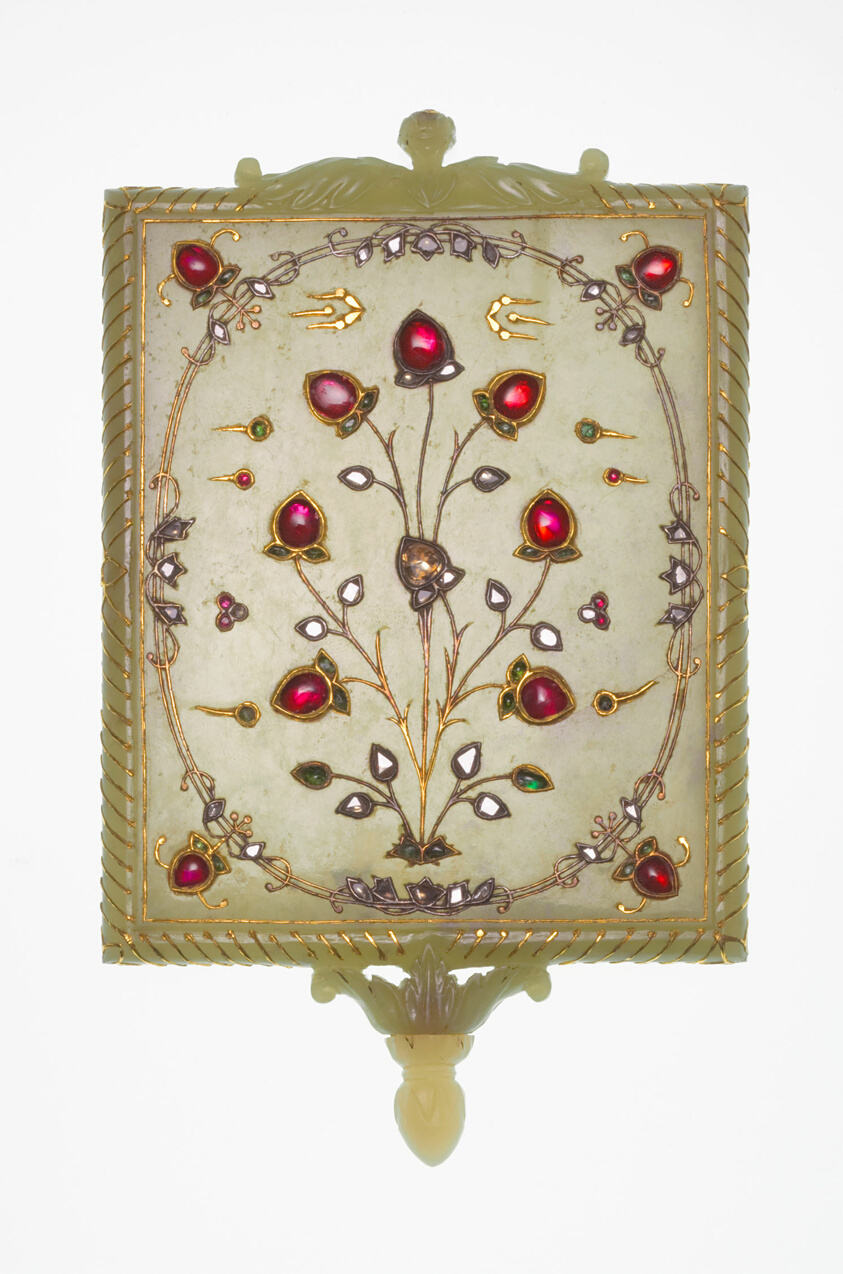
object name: Decorative Arts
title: Mirror Frame with Tree of Life Motif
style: South Asian, mughal, Islamic, Indian (South Asian)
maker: India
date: Mughal dynasty (1526-1857), 17th/18th century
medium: Nephrite jade, gold, rubies, emeralds, and diamonds inset in the kundan technique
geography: India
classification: mirror; jade; household accessory; decorative object/ornament; asian art; decorative arts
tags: mirrors, plants, gems, tree of life